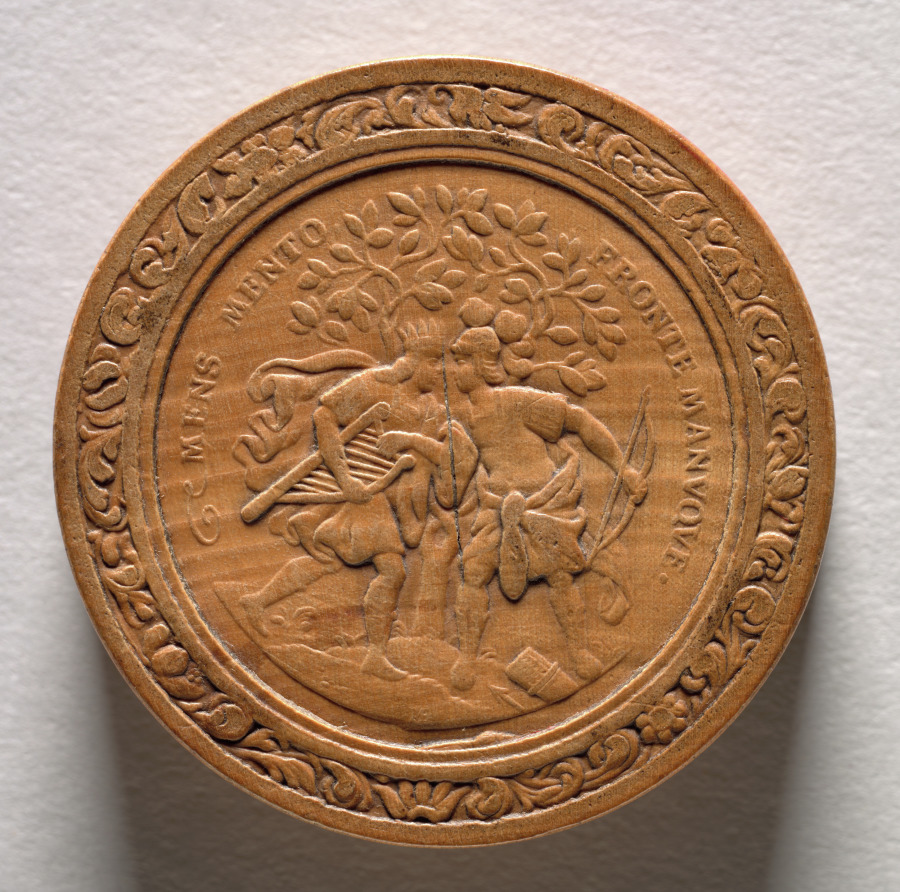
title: Gaming Piece (reverse)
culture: Germany, late 17th-early 18th Century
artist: Martin Brunner (German, 1659–1725)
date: c.1700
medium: wood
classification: Furniture and woodwork